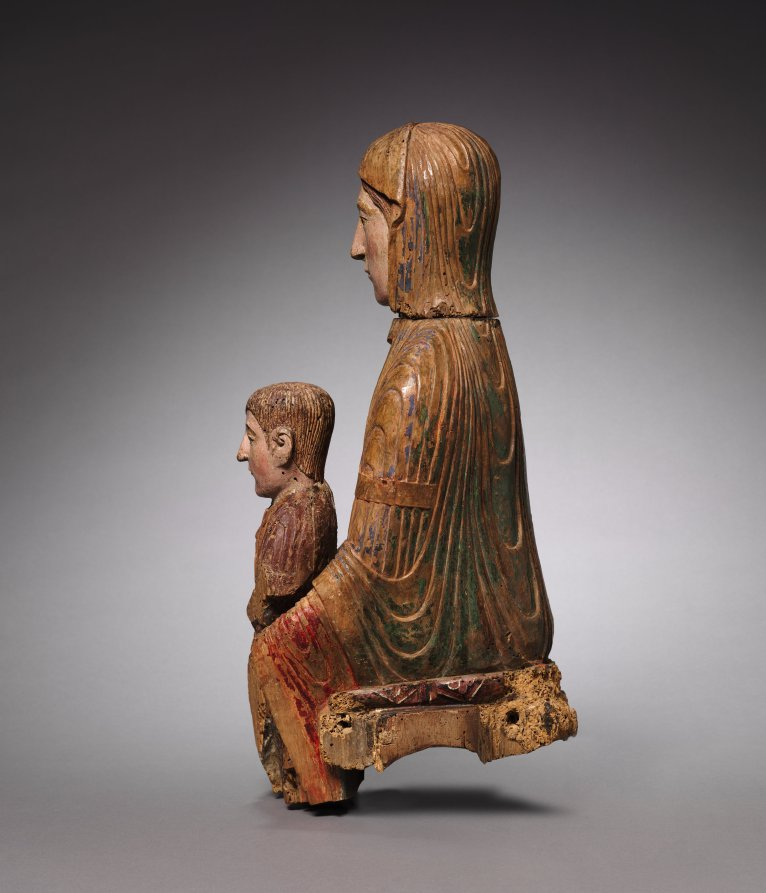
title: Virgin and Child in Majesty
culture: France, Auvergne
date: c. 1150–1200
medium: polychrome wood (walnut)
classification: Sculpture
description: This sculpture belongs to a group of early representations of the Virgin and Child known as the Sedes Sapientiae (the Throne of Wisdom). The subject embodies a complex and core Christian doctrine of the Virgin’s role in the Incarnation (the moment in which Christ became flesh) and ultimately in the redemption of humankind. Mary faces forward, her gaze toward the beholder. As she is seated on a throne, she in turn becomes the throne to the Christ child, thus symbolizing her role in giving birth not only to the human Jesus, but also to the divine Christ. The Incarnation gave Mary a unique role as principal mediator between heaven and earth, and between God and humankind. As a result, her image proliferated in art, especially after the 12th century, a period in which there was surging interest in Mary’s life and increasing devotion to her person and images. The sculpture belongs to a rare group of surviving figures produced in the Auvergne region of central France during the second half of the 12th century. These "Auvergne" Virgins are estimated to number only about 25 or 30 and are characterized by their linear, calligraphic draperies, which form beautiful swirls and contours. All such sculptures are smaller than life-size and made of wood in order to make them mobile. Evidence suggests that they were moved from altar to altar or church to church, and were frequently carried in procession within churches and town streets on Marian feast days. The heads were intentionally removable in order to "dress" them in costumes for such processions.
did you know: In this sculpture of Mary and Jesus, their heads are detachable.